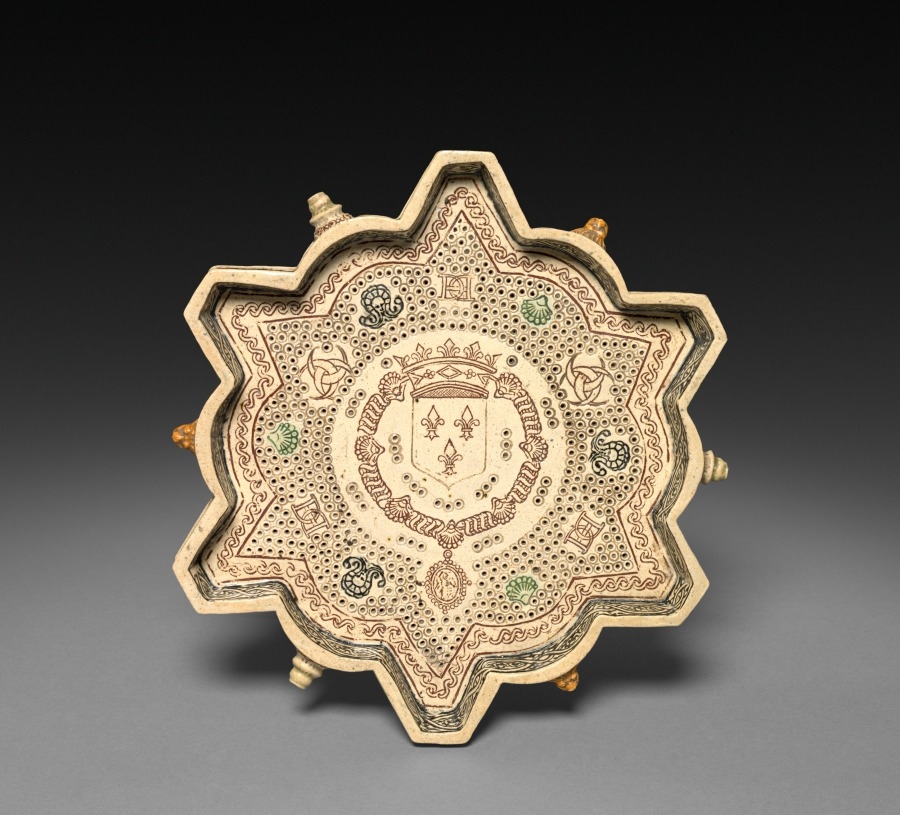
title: Pedestal Dish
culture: France, 19th century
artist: after Saint-Porchaire (French)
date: 1800s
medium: white earthenware with inlaid decoration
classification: Ceramic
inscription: in center of dish, arms and crown of France encircled by chain of Order of St. Louis, around which are interlaced initials DDH [monogram of Henri II] and three interlaced crescents (device of Diane de Poitiers).